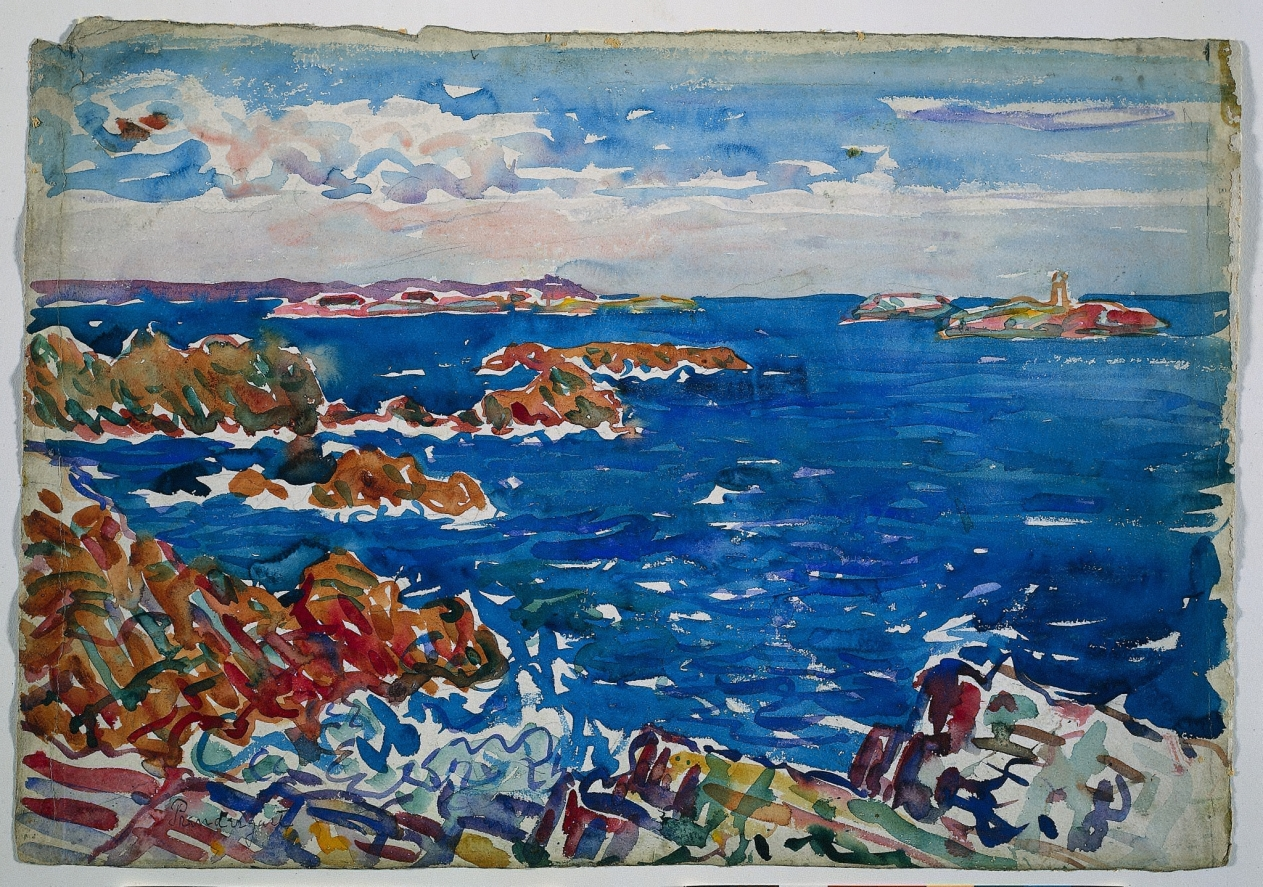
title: The Rocky Seashore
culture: America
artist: Maurice Prendergast (American, born Newfoundland [now Canada], 1858–1924)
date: c. 1907–10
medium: watercolor with traces of graphite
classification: Drawing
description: Throughout Prendergast’s career, the seaside was one of his favorite subjects, but in this watercolor, his true concern was color. Painting rapidly, Prendergast allowed the white of the paper to show around the edges of his jagged strokes of color, suggesting sunlight on wet rocks. This spontaneous seascape identifies him as one of the first American artists to experiment with modernism before the Armory Show in New York City of 1913, the first large-scale exhibition of European modern art held in the United States.